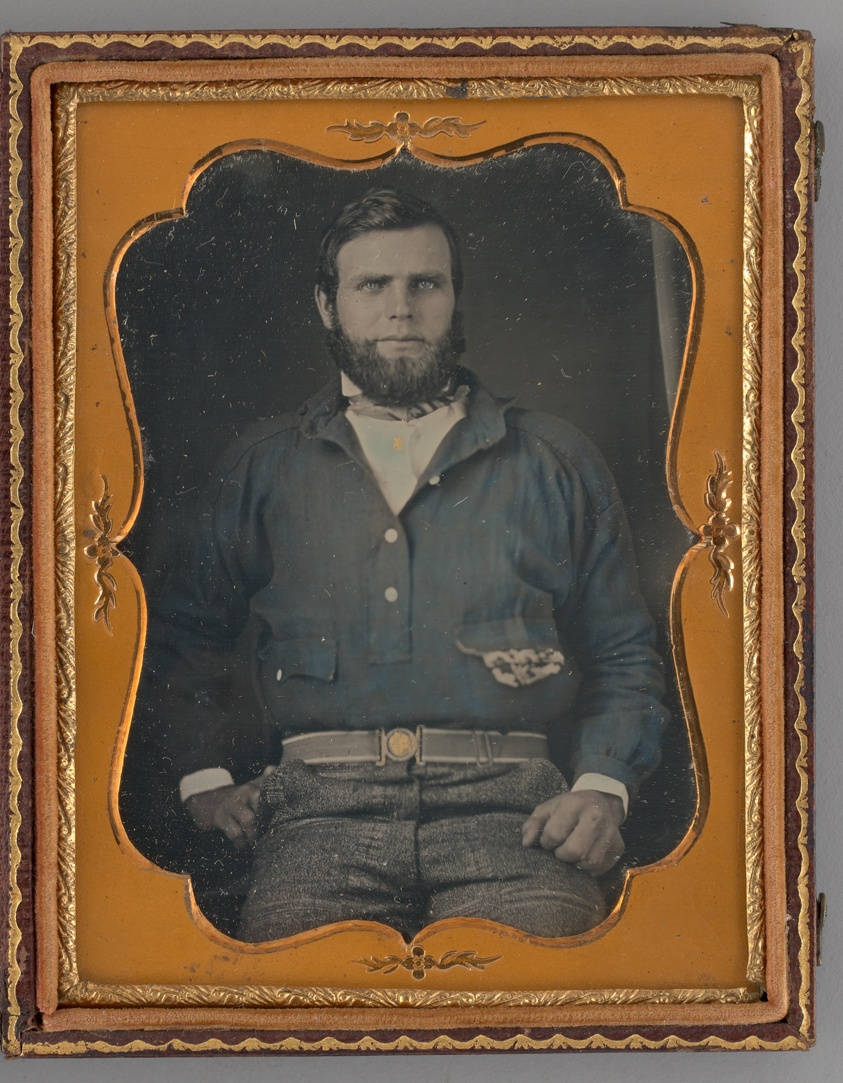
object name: Photograph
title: Untitled (Portrait of a Gold Miner)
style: 19th century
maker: Unknown maker; American, 19th century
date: 1853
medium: Daguerreotype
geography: United States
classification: portrait; daguerreotype; portrait; photograph; photographic process; photography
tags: lundberg collection, gold mining, gold rush, Male, portrait, portraits, portraits: male subject